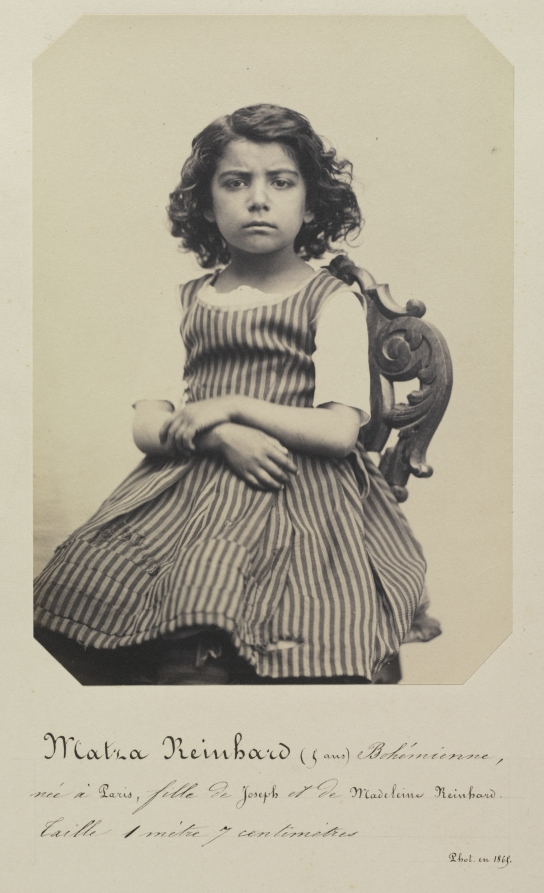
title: Matra Reinhard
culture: France, 19th century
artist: Jacques-Philippe Potteau (French, 1807–1876)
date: 1868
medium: albumen print from wet collodion negative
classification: Photograph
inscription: written in black ink on recto: "Matra Reinhard (5 ans) Bohémienne neé à Paris, fille de Joseph et de Madeleine Reinhard. Taille/ mètie 7 centimètres/ Phot. en/ 1868"; on verso in pencil: "16 [circled] Collection TEXBRAUN- Paris-/ LOUIS ROUSSEAU."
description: These striking portraits of working-class girls were made as ethnographic or artistic studies of types. Potteau’s photograph was part of an anthropological series the naturalist produced for the National Museum of Natural History in Paris. Employing the standard commercial portrait studio conventions of the time, he carefully posed his subject in an even light. However, instead of a painted backdrop, Potteau used a plain background as if shooting a scientific specimen. On the mount he recorded her biographical data: her name, that she was born in Paris to parents from Bohemia five years ago, and that she stands three and a half feet tall.